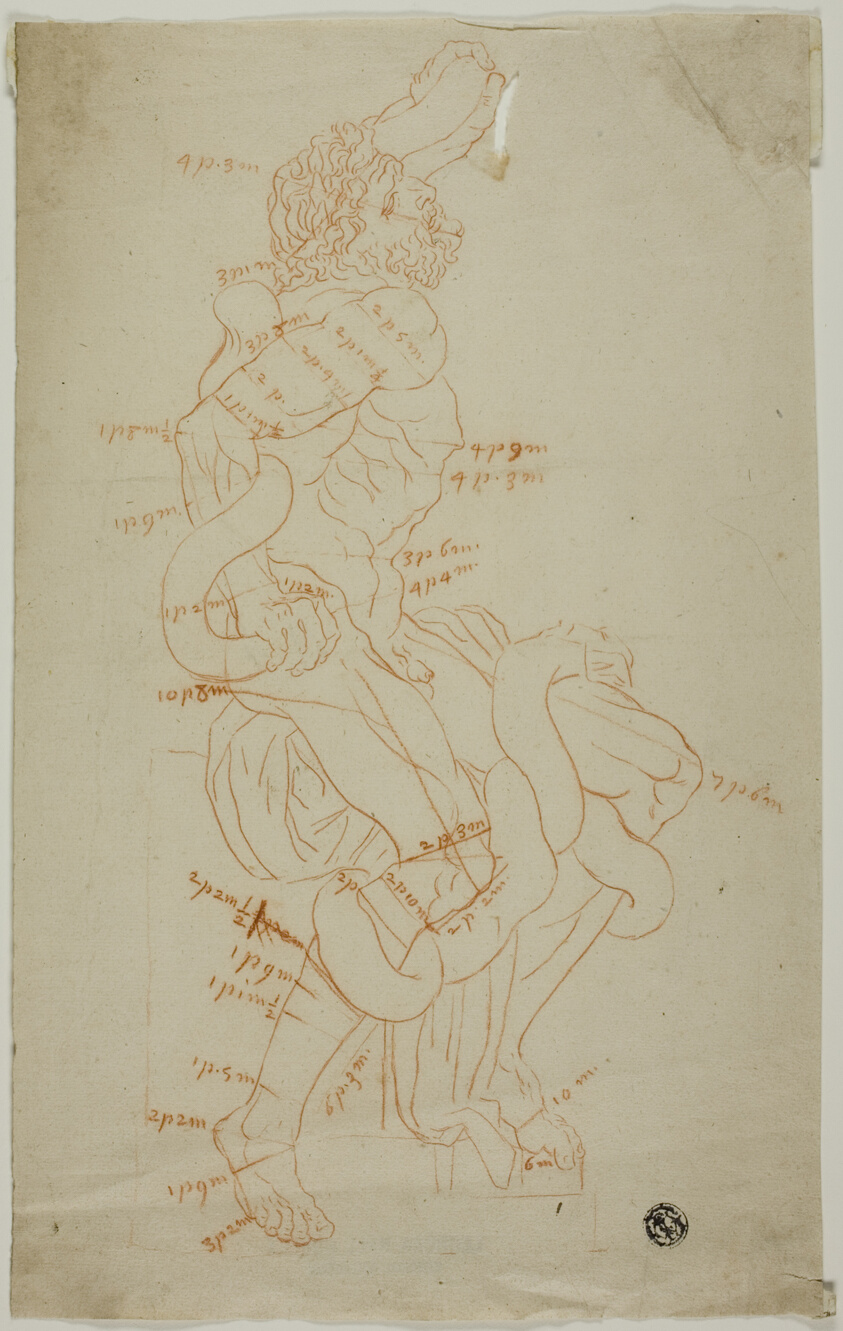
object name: Drawing and Watercolor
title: Study After Laocoon Sculpture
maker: Unknown Artist; European, n.d.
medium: Red chalk on cream laid paper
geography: Europe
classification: chalk; drawings (visual works); prints and drawing